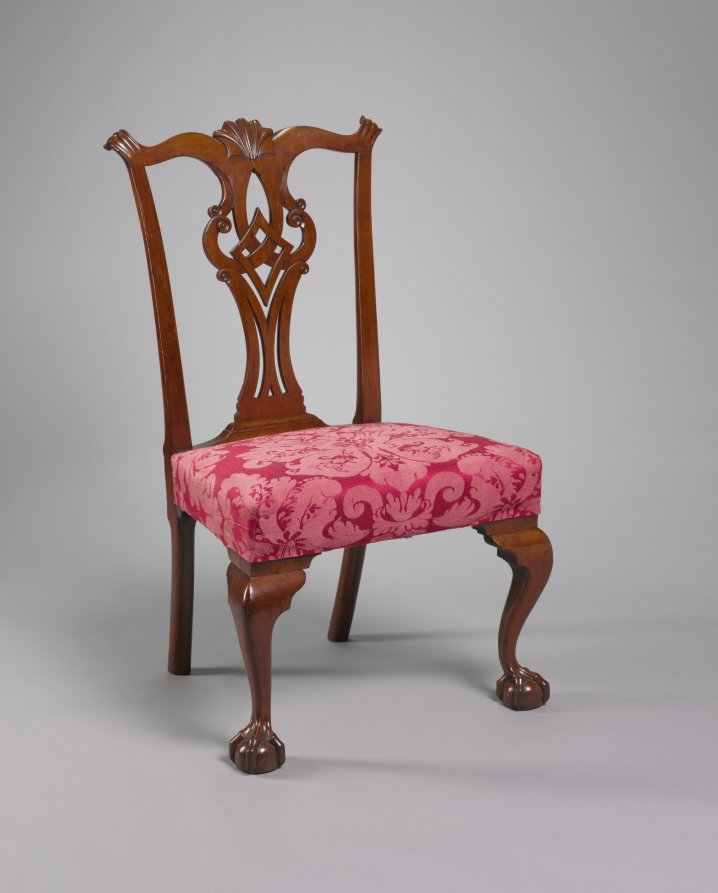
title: Side Chair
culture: America, Connecticut, East Windsor, 18th century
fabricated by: Eliphalet Chapin (American, 1741–1807)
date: c. 1775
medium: cherry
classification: Furniture and woodwork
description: Before becoming one of the best known Connecticut furniture makers of the late 1700s, Eliphalet Chapin worked in New York City and Philadelphia. His furniture shows evidence of that experience. For example, the back of this chair has a splat design found on New York pieces, while the untapered rear legs and the shell carving on the crest rail are typical of Philadelphia workmanship. The use of cherry, however, is characteristic of Connecticut furniture. This chair comes from a set recorded in Chapin's account book as having been supplied to Ebenezer Grant to form part of the dowry of his daughter Anne, who married the Reverend John Marsh of Wethersfield, Connecticut, on December 6, 1775. The set was owned by their descendants until 1986.